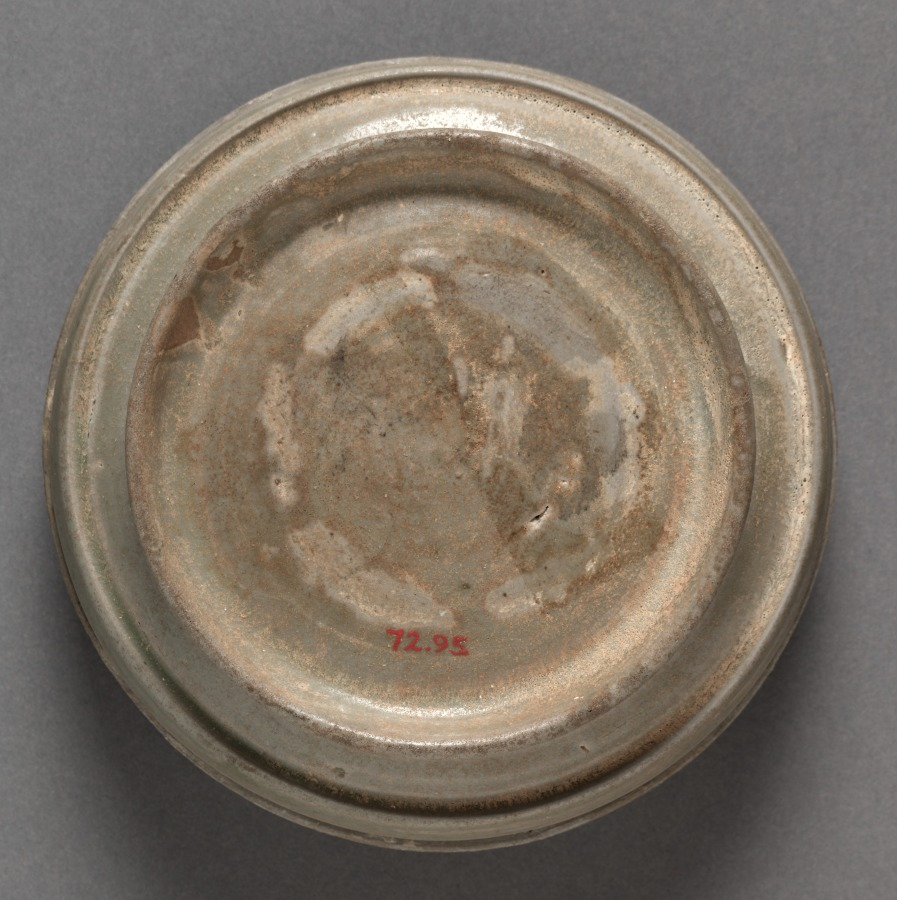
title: Covered Box: Yue Ware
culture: China, Shang-lin-hu kilns, Yu-yao District, Zhejiang province, Five dynasties (907-960)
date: 907–960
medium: glazed stoneware with incised decoration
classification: Ceramic